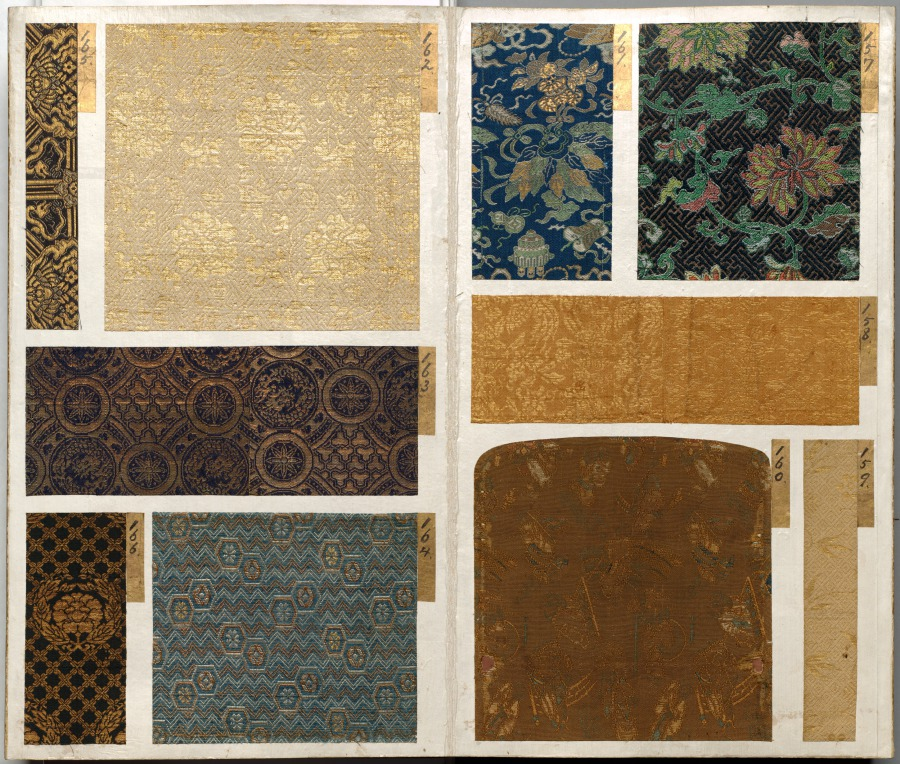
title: Album of Textile Samples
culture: Japan, Edo period (1615–1868)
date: 1600s-1700s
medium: silk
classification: Textile